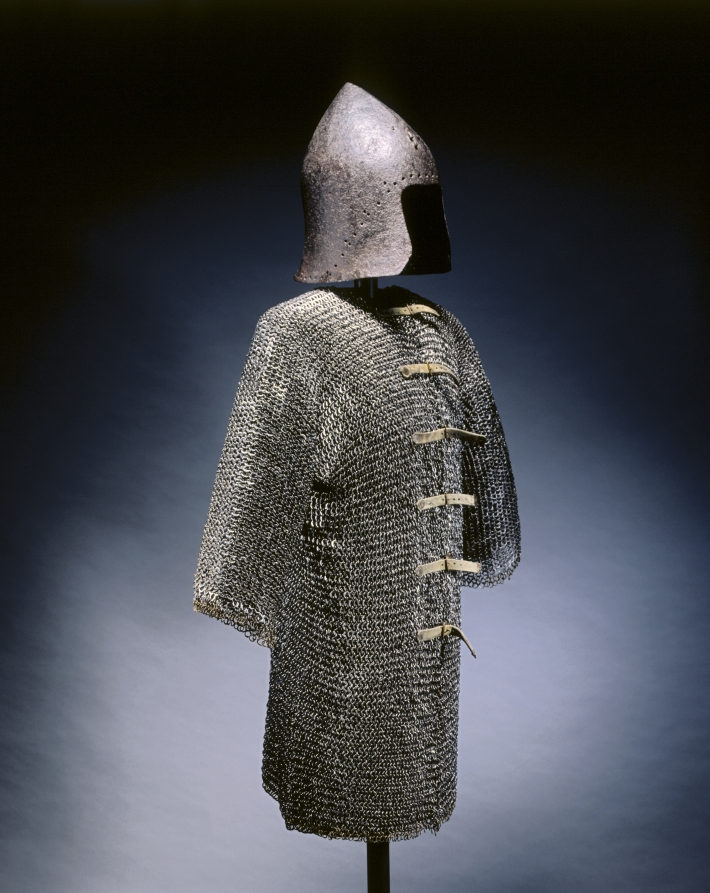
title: Barbute (from the Venetian Garrison at Chalcis)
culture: North Italy, 14th-15th century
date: c. 1350–1420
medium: iron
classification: Arms and Armor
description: This is a rare example of a type of helmet used from about 1350 to 1480. Its conical shape deflected glancing blows to the head. Italian chronicles refer to professional men-at-arms as barbuti. The word derives from the Italian barba, or beard, a reference to the hood of mail often attached to these early helmets. The row of small holes along the face opening and neck were for the attachment of the hood and lining.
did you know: This helmet and a number of others were apparently excavated from the Venetian garrison at Chalcis on the Greek island of Euboea.